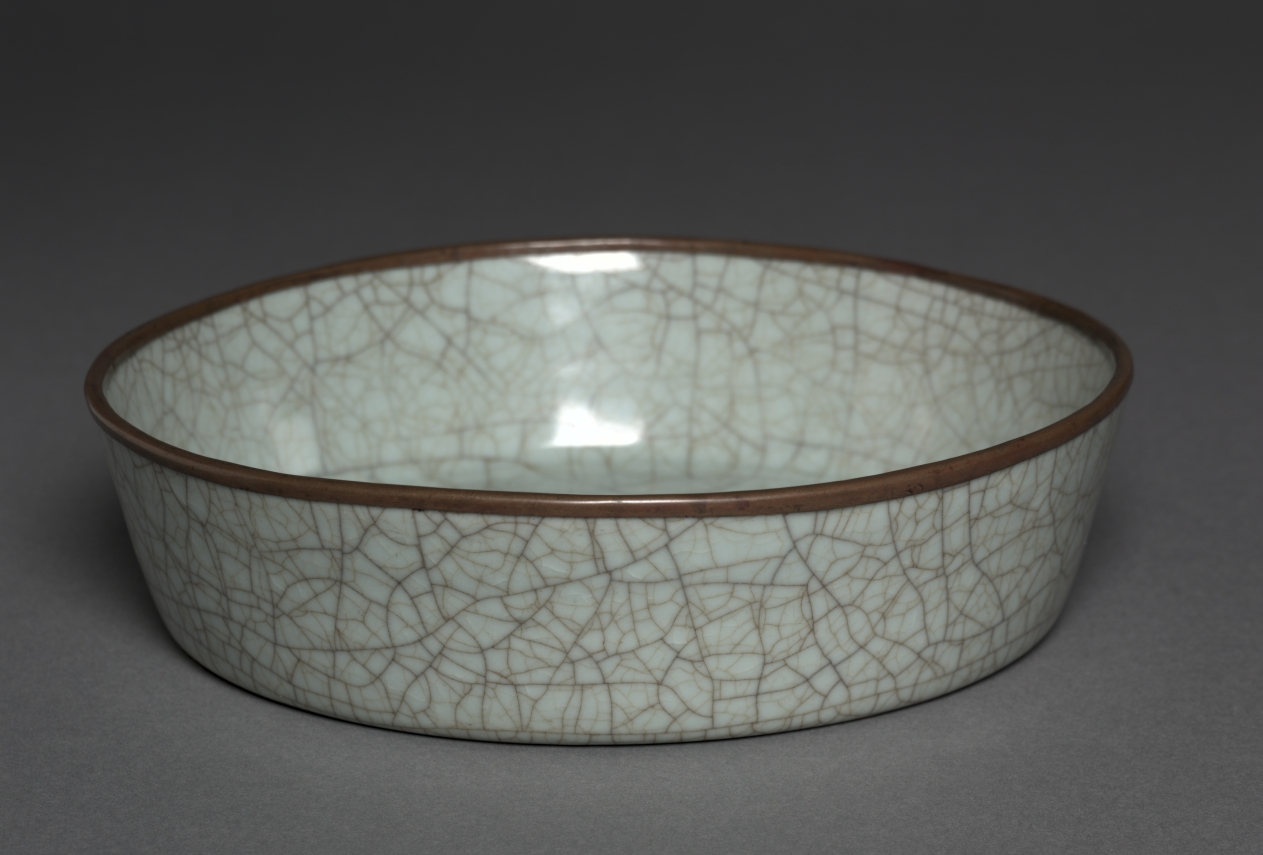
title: Basin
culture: China, Zhejiang province, Hangzhou, Southern Song dynasty (1127-1279)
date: 1127–1279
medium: porcelaneous stoneware, Guan ware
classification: Ceramic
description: Guan ware was the official ware fired at the Southern Song imperial kilns in Hangzhou. Multiple glazing is characteristic of this ware. The total thickness of the glaze can be greater than the clay body that supports it. Here, the thick gray-green glaze is webbed with a wide network of dark brown crackles as well as finer webs of light golden-brown and colorless crackles. The crackle pattern was developed after firing, due to the different rates of expansion and contraction of the body and the glaze. It was consciously exploited to achieve an aesthetic effect and was stained at different stages during the cooling process.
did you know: The base shows that the basin was fired on 17 small spurs arranged in two concentric circles.